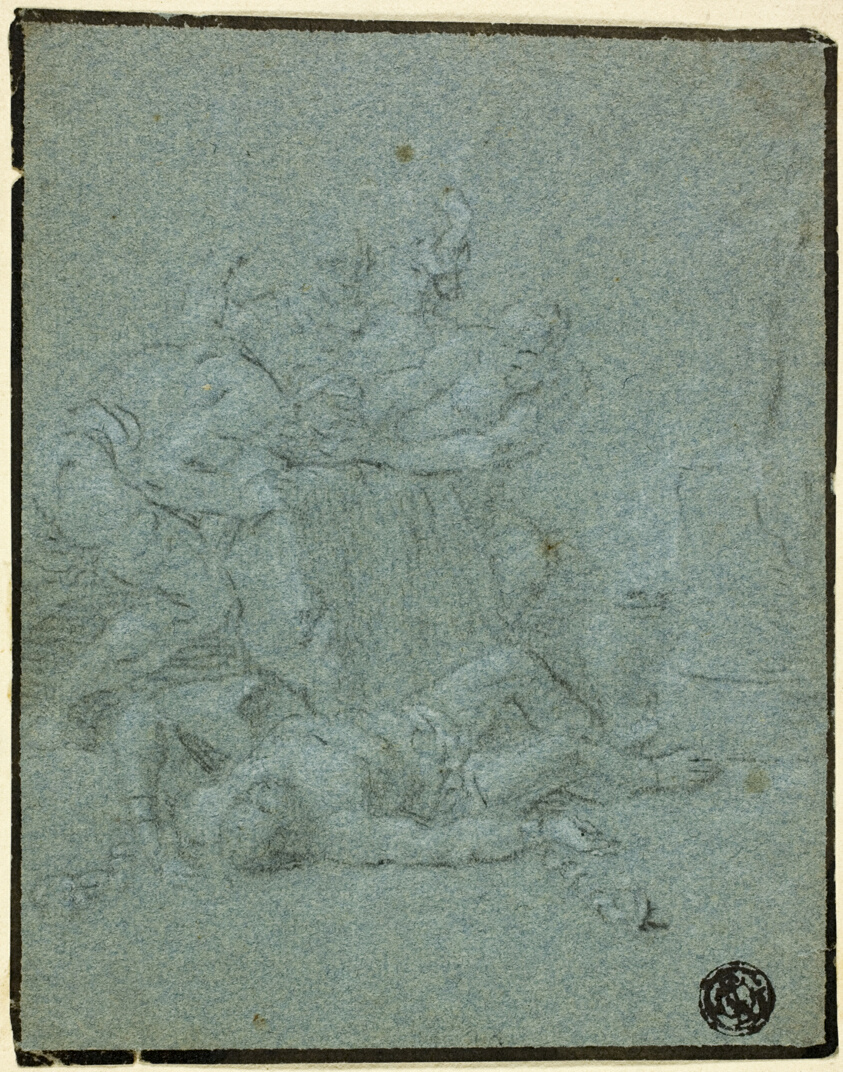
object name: Drawing and Watercolor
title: Two Men Holding Boulder over Prostrate Man with Manacles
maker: Possibly after Victor Honoré Janssens; Flemish, 1658-1736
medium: Black chalk, with pen and brown ink, on tan laid paper, laid down on card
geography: Flanders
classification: chalk; drawings (visual works); prints and drawing